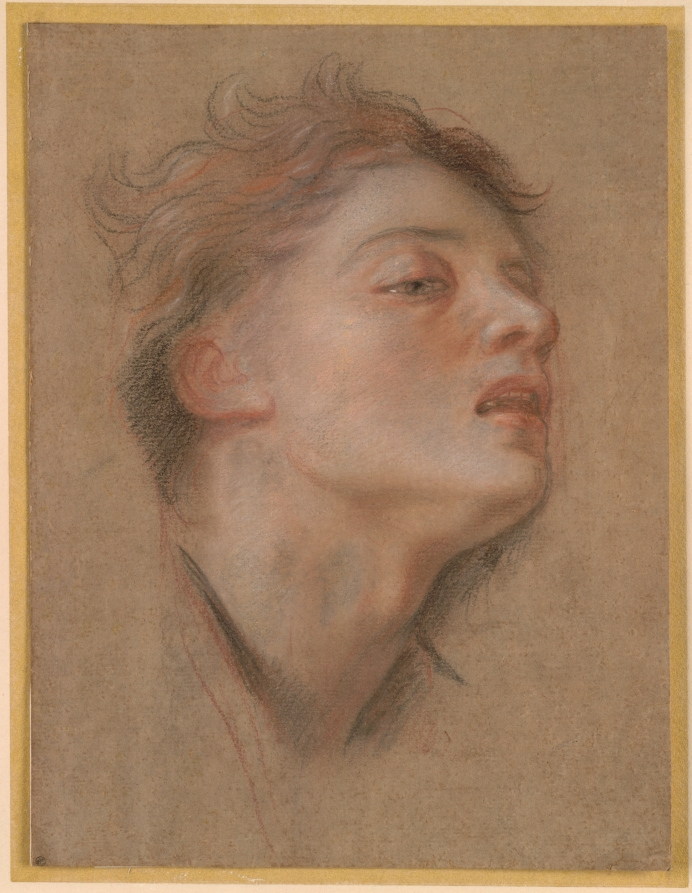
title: Head of a Young Man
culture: France, 18th century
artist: Antoine Coypel (French, 1661–1722)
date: 1715–1717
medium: red, black, and white chalk with stumping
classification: Drawing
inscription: Mount inscribed "Barocci" in graphite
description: The most important French painter of his generation, Antoine Coypel worked during the period of transition from the monarchy of Louis XIV (reigned 1643-1715) through the Regency (1715-1723) and the ascendance of Louis XV (reigned 1715-1774). A beautiful colorist also steeped in the academic tradition of drawing, Coypel used red, black, and white chalk together on this sheet to achieve tonal range. The drawing is connected to Coypel's greatest achievement: the series of large painted decorations for the Gallery of Aeneas in the Palais Royal in Paris. This study of facial expression shows one of the mourners attending the funeral of Pallas, a scene from Virgil's (70-19 bc) Aeneid. Though this painting still exists in the collection of the Louvre Museum, it is in a ruined state. Most of the paintings for the Gallery of Aeneas did not survive at all, but there are numerous drawings for the project.